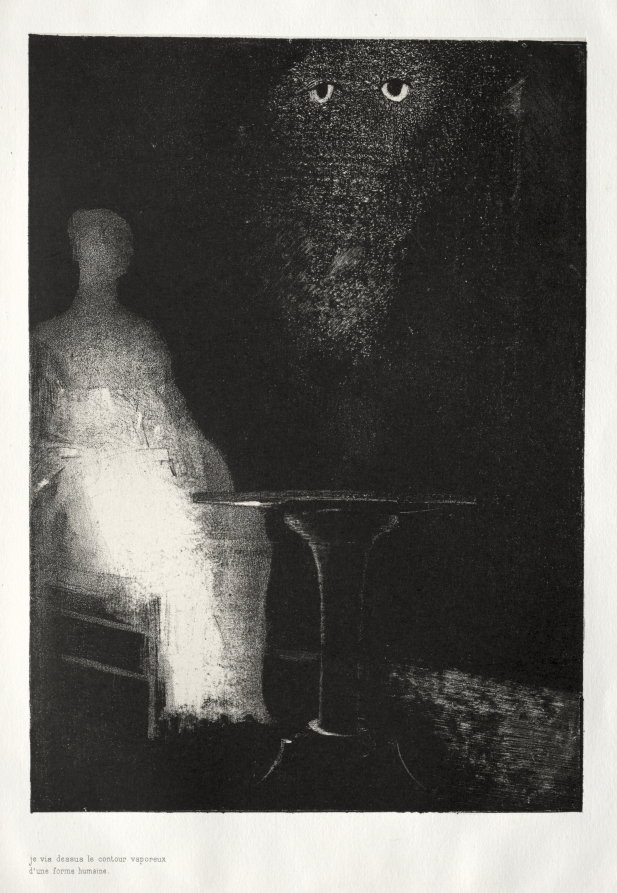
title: Below, I Saw the Vaporous Contours of a Human Form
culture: France, late 19th Century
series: The Haunted House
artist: Odilon Redon (French, 1840–1916)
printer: Auguste Clot (French, 1858–1936)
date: 1896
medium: lithograph on China paper laid on wove paper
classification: Print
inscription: printed at lower left, below image: je vis dessus le contour vaporeux d'une femme humaine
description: Odilon Redon was a voracious reader of contemporary literature, and such texts often influenced his art. This series was inspired by The Haunted and the Haunters, an 1859 novel by British writer Edward Bulwer-Lytton. Redon’s prints capture the book’s mysterious tone and emphasis on the supernatural through vague but evocative imagery that sometimes borders on abstraction. By this time a seasoned expert in lithography, the artist collaborated with master printer Auguste Clot. Their combined technical skills allowed for the rich tonal variation seen here, made by turning Redon’s lithographic crayon on its side, layering various marks, and even scratching directly into the surface of his stone.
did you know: One of Redon's greatest patrons, the occultist René Philipon, commissioned this portfolio as a supplement for his French translation of Bulwer-Lytton's The Haunted and the Haunters.